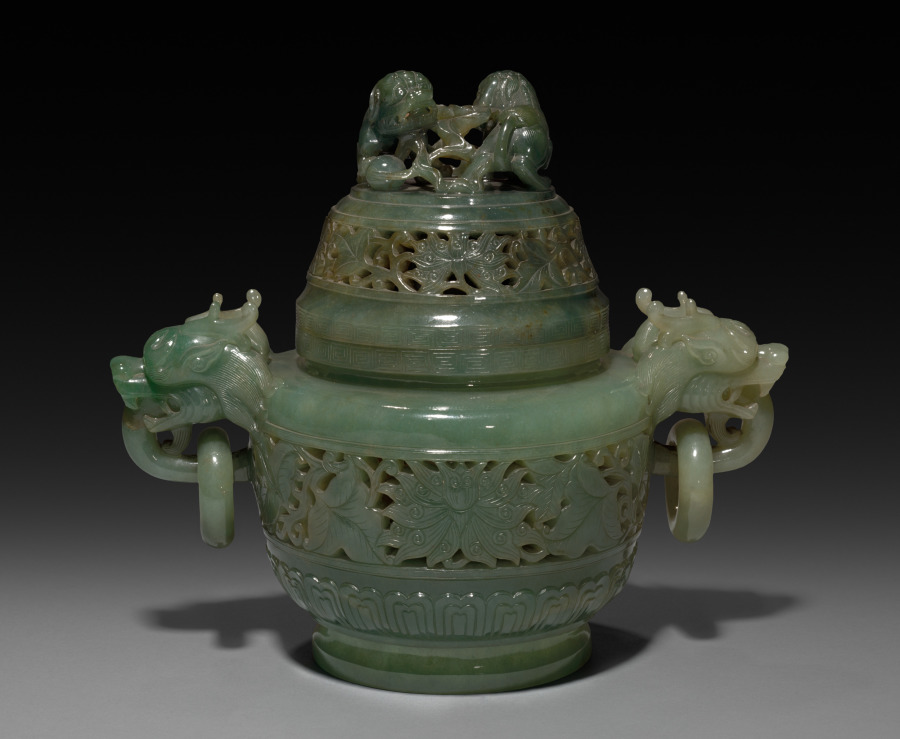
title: Koro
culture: China, Qing dynasty (1644–1911), Qianlong reign (1736–95)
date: 1736–95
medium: jade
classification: Jade